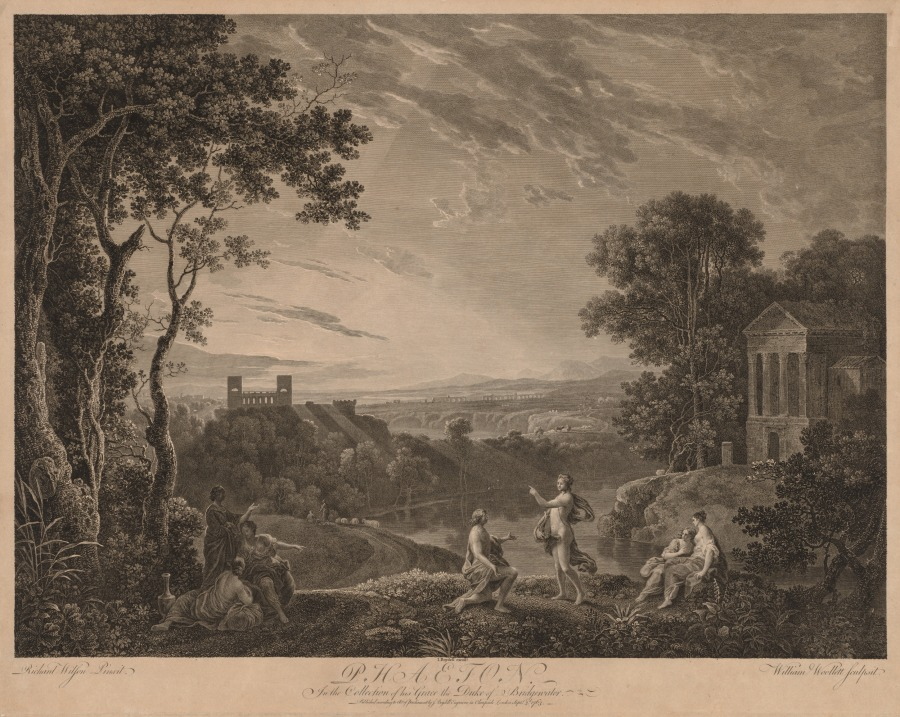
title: Phaeton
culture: England, 18th century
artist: William Woollett (British, 1735–1785)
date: 1763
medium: engraving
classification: Print